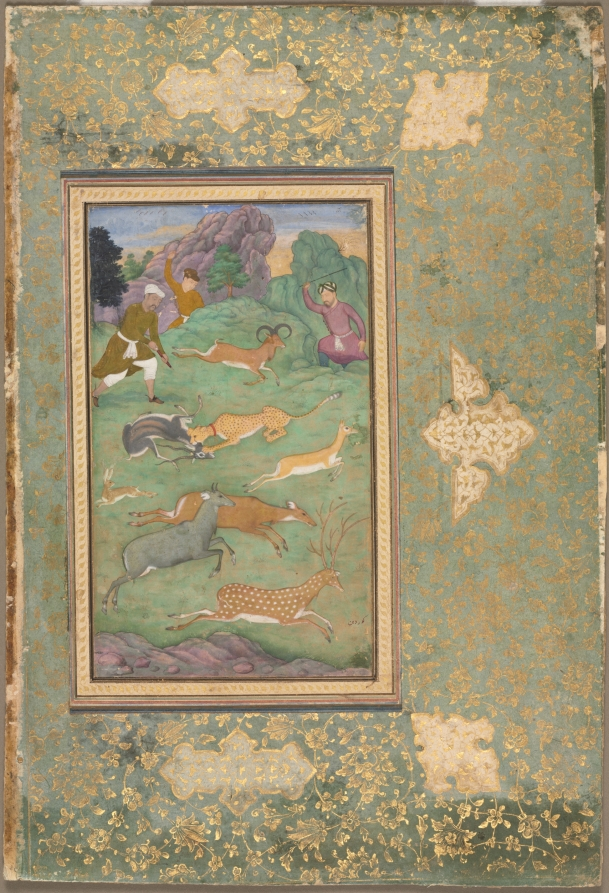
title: Antelope and deer hunt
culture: Mughal India, Allahabad, made for Prince Salim (1569–1627)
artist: Govardhan (Indian, active c.1596–1645)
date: c. 1602–4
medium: Gum tempera and gold on paper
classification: Painting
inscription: recto, lower right: Govardhan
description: The Mughals used trained cheetahs, such as this one wearing a red collar, to capture prey during hunting expeditions in the wilderness. The metaphor of the hunt was also a potent image in Persian literature, in which the protagonist finally achieves a desired goal. The central image of the cheetah catching the black buck—a frequently repeated visual trope—resonates with the desire of Prince Salim (who was passionate about hunting) to capture the throne of the Mughal Empire from Akbar, his father. Between 1600 and 1605, when Prince Salim set up his own royal court in defiance of his father, he convinced some imperial artists to join him. The young Govardhan, a Hindu who would go on to achieve high stature in the atelier of the next two emperors, was one of them.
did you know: The gray antelope in the foreground is called a nilgai and is the largest antelope in Asia.